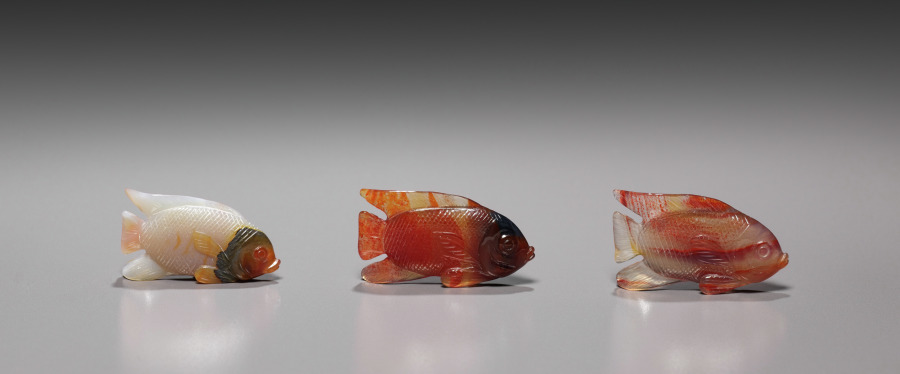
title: Set of Three Fish in Original Box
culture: Russia, St. Petersburg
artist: House of Fabergé (Russian, 1842–1918)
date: c. 1890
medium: agate, holly, silk velvet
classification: Miscellaneous